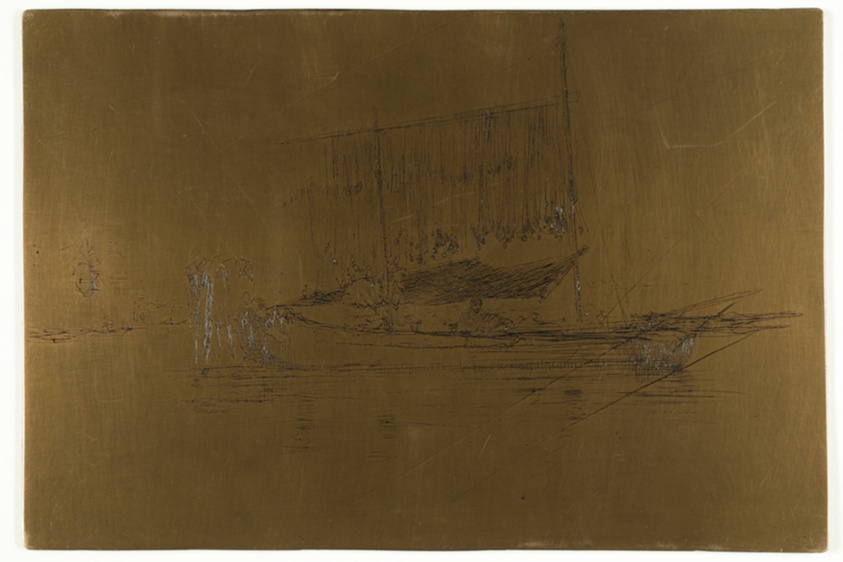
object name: Print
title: The Fishing Boat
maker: James McNeill Whistler (American, 1834-1903)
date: 1879/80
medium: Cancelled copper plate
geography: United States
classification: copper plate; prints and drawing; matrix; print